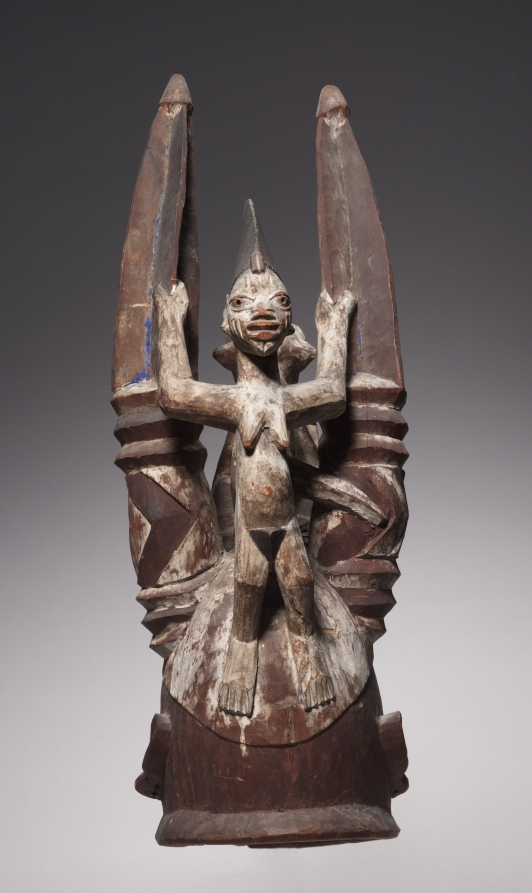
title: Helmet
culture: Africa, West Africa, Nigeria, Yorùbá-style maker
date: late 1800s–early 1900s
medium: Wood and paint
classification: Mask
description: This type of helmet used by the Oro association, is often mistaken for the more common Egungun. While Egungun masquerades are performed to honor an individual's ancestors, Oro masquerades are performed in conjunction with the actual funeral of a Yoruba person. The Oro association is very secretive, and the visibility of helmets like this one is generally restricted. Oro is also responsible for carrying out criminal sentences, such as collecting fines, repossessing goods, and executing those convicted of a capital crime. The female figure suspended from the back of the horns may reference the victims of Oro executions. This work has been attributed to the Esubiyi School of Abeokuta, founded about 1860.